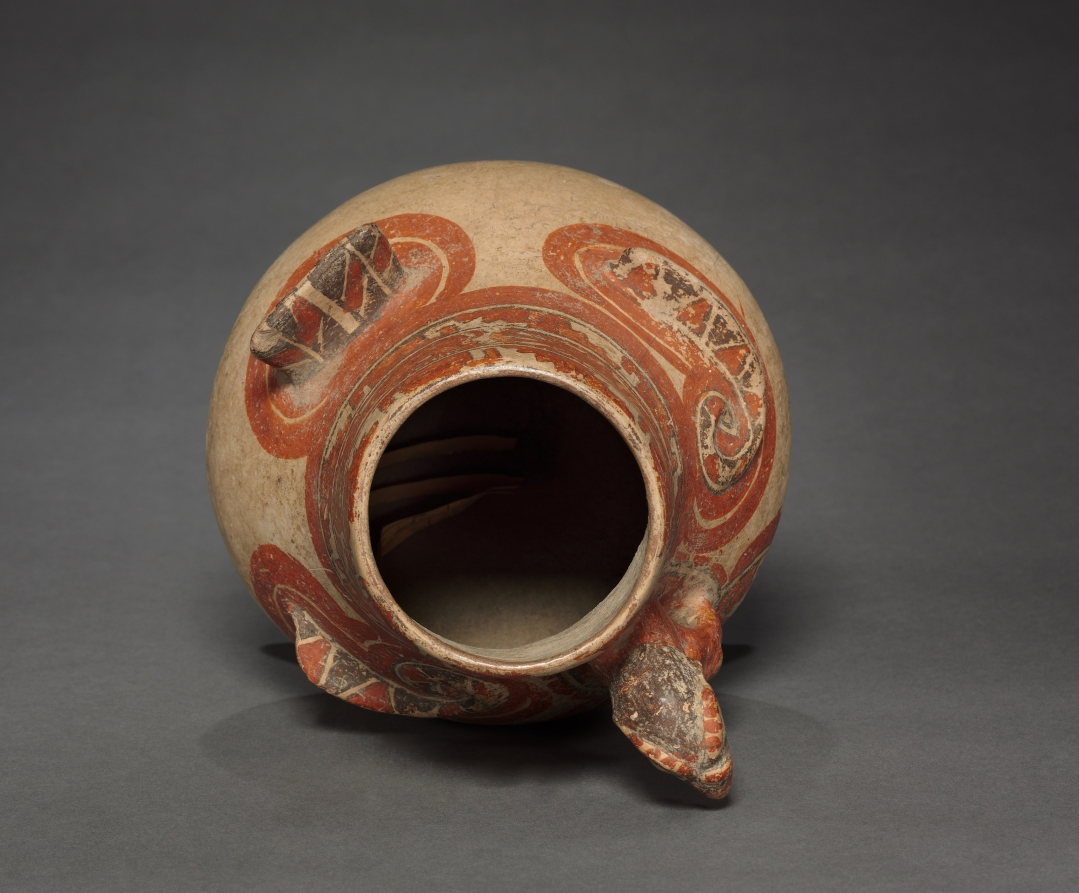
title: Turkey Vessel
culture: Costa Rica, Southern Nicoya region, Pataky Polychrome style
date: c. 1000–1550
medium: ceramic, slip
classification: Ceramic